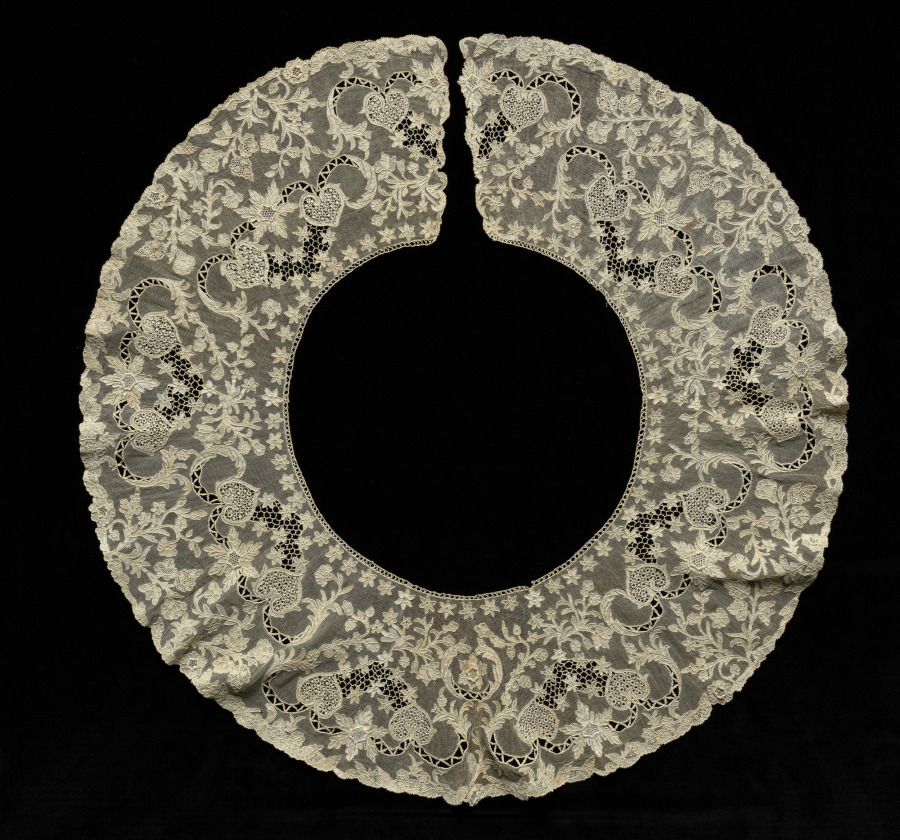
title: Lace Bertha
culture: Italy, Burano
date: 1800s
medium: Linen: needle lace (Burano Point)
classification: Lace